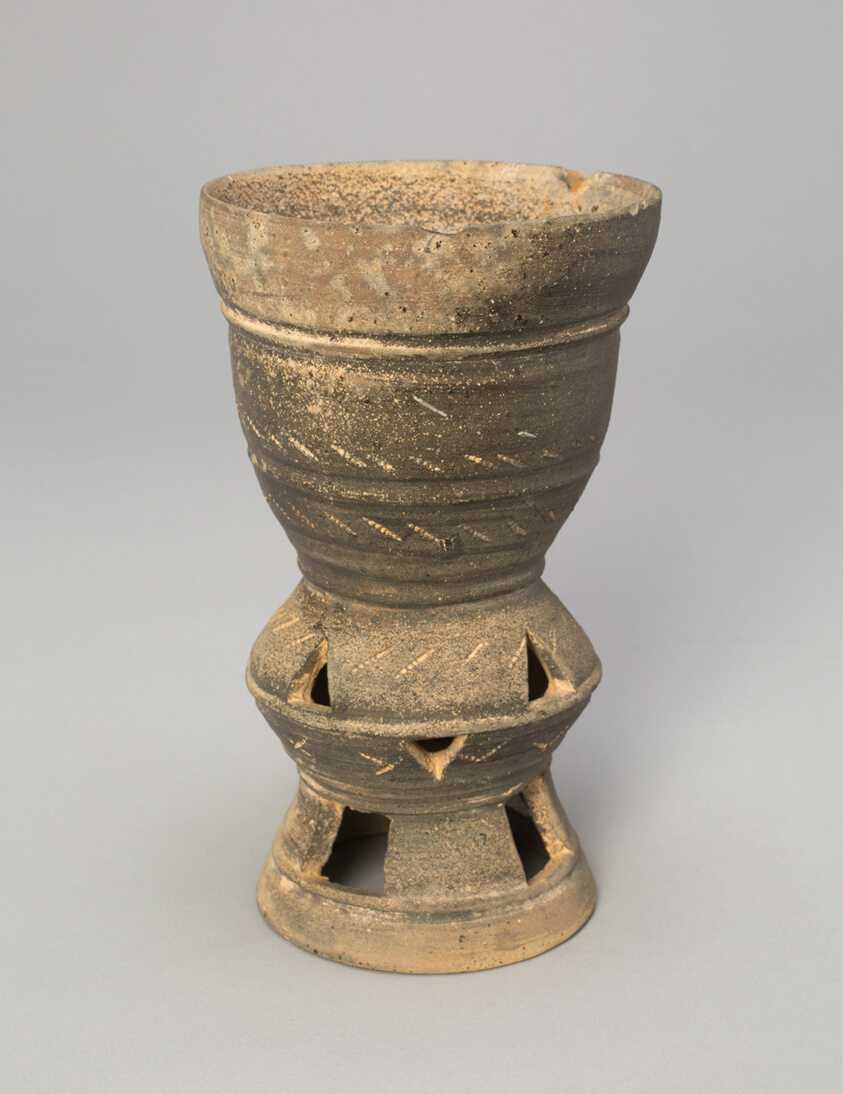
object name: Vessel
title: Cup with Interior Rattle and Incised and Openwork Decoration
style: Korean (culture or style)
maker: Korea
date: Three Kingdoms period (57 B.C.–A.D. 676), Gaya Federation (42 BC–562 AD), 5th century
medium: Stoneware with natural ash glaze and incised decoration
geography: Korea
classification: drinking vessel; stoneware; asian art; ceramics; vessel